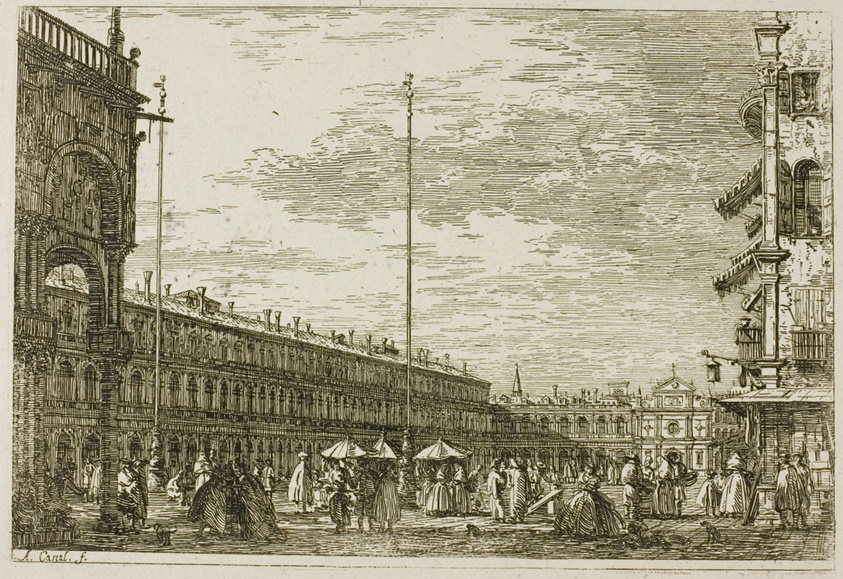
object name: Print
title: Le Procuratie niove e S. Ziminian V, from Vedute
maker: Canaletto (Italian, 1697-1768)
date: 1735/44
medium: Etching in black on ivory laid paper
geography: Italy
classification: etching; print; prints and drawing